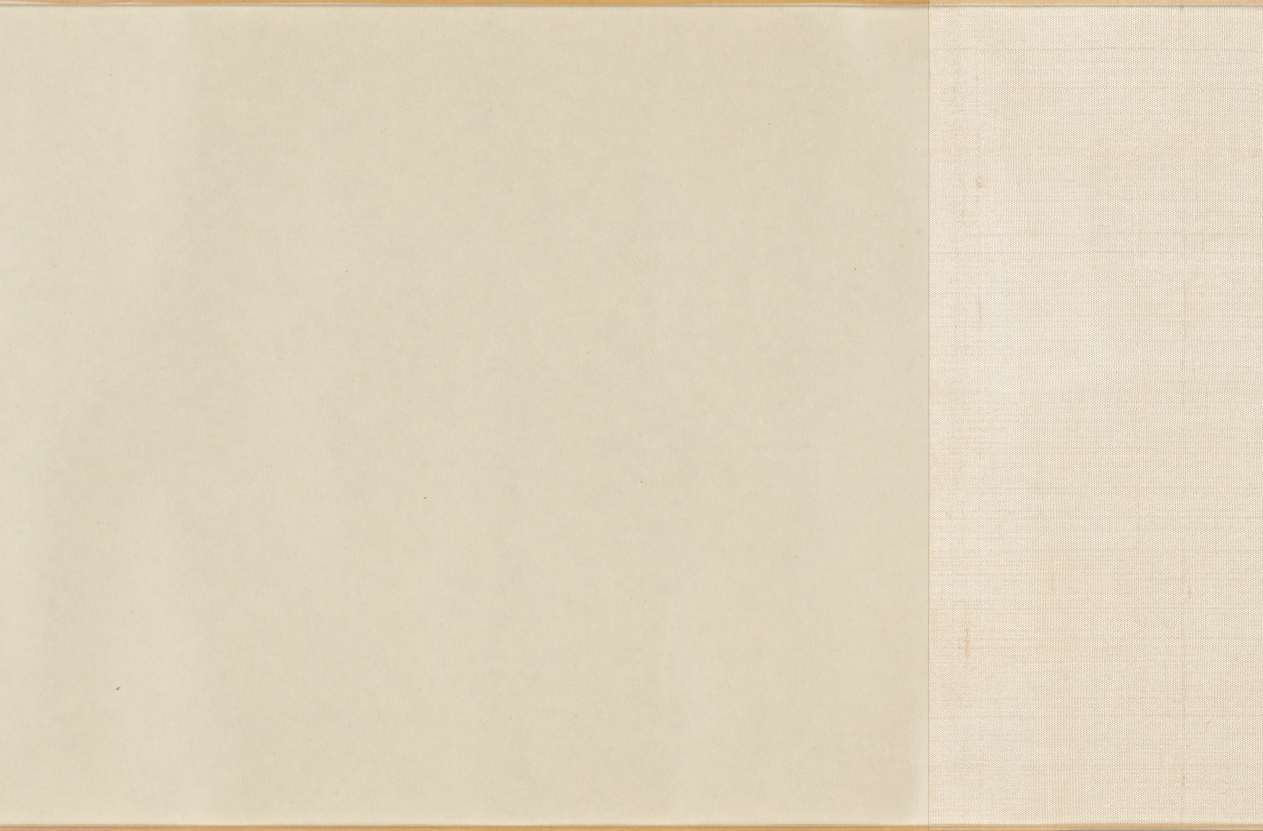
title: Selections from the New Collection of Japanese Poems from Ancient and Modern Times (Shinkokin wakashū) with Printed Designs of Chinese Lions and Crab Finger Grass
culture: Japan, Edo period (1615–1868)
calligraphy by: Hon'ami Kōetsu (Japanese, 1558–1637)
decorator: Tawaraya Sōtatsu (Japanese, c. 1570–c. 1640)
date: early 1600s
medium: handscroll; ink, gold, and silver on paper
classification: Calligraphy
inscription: Seal: 光悦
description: Hon’ami Kōetsu was a calligrapher and craftsman who frequently collaborated with the painter Tawaraya Sōtatsu, considered the first master of the Rinpa school. Kōetsu brushed seven poems from the autumn section of a poetry anthology onto dyed paper with motifs designed and printed in gold and silver by Sōtatsu.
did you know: Before becoming a master painter of screens, Tawaraya Sōtatsu painted fans.